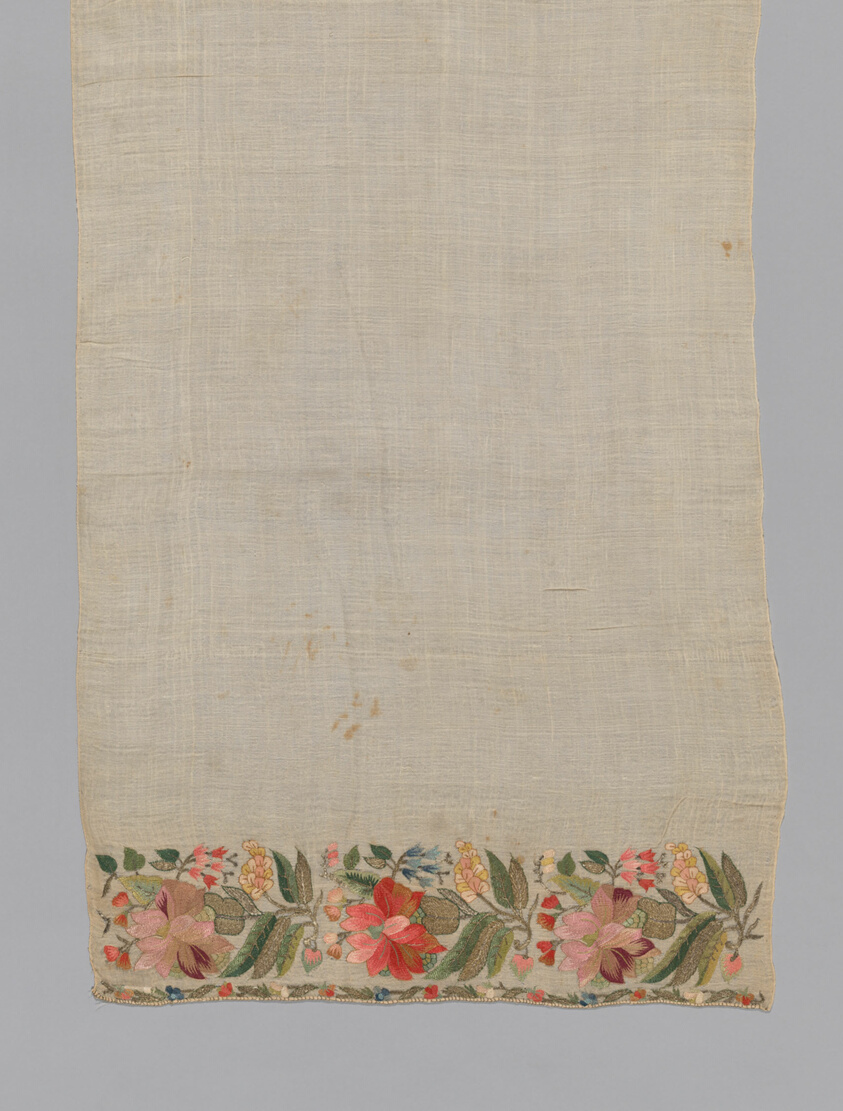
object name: Textile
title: Towel or Napkin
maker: Turkey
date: 1875/1900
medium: Embroidered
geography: Turkey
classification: textile; weaving; needlework (visual works)